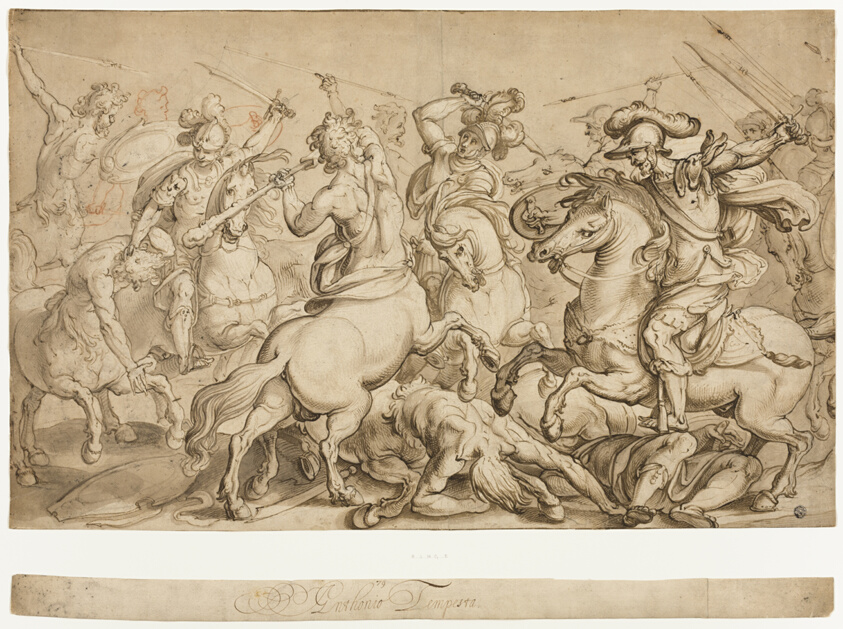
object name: Drawing and Watercolor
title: Battle of the Lapiths and Centaurs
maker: Antonio Tempesta (Italian, 1555-1630)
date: c. 1600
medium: Pen and ink, and brush and brown and gray wash, red chalk, and white gouache, over traces of black chalk, on ivory laid paper; incised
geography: Italy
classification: pen and ink drawings; drawings (visual works); prints and drawing